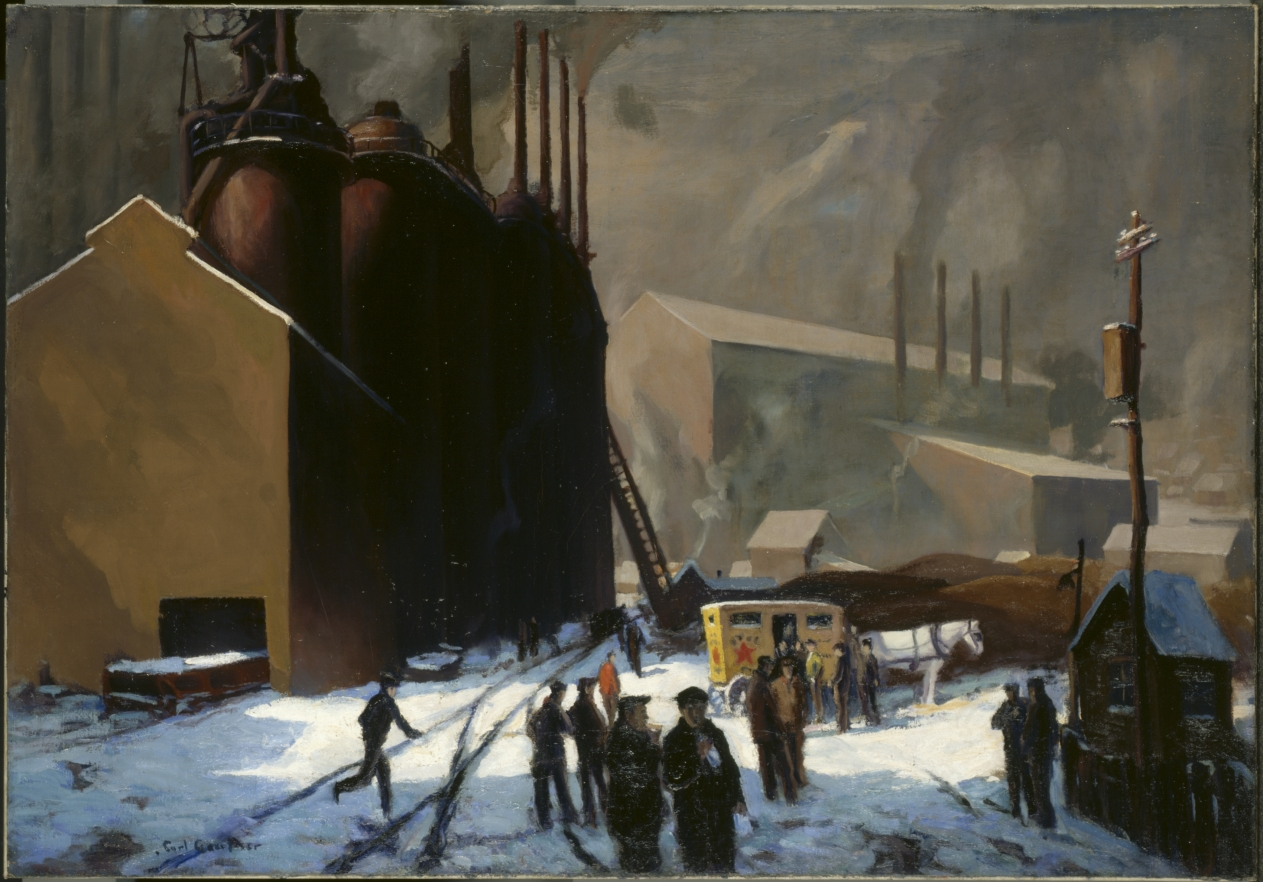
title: The Pie Wagon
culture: America, Ohio, Cleveland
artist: Carl Gaertner (American, 1898–1952)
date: c. 1926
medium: oil on canvas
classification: Painting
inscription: signed lower left: Carl Gaertner.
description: One of the most widely exhibited artists working in Cleveland, Gaertner specialized in painting the city and its environs. His favored subjects include scenes of Cleveland’s industrial heyday, including The Pie Wagon. In this painting, the artist focused attention on the laborers who spend their lunch break milling around a horse-drawn bakery wagon in the shadows of the hulking factories.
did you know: Star Bakery—identified by the logo on the wagon—was a flourishing business in Cleveland at the time.